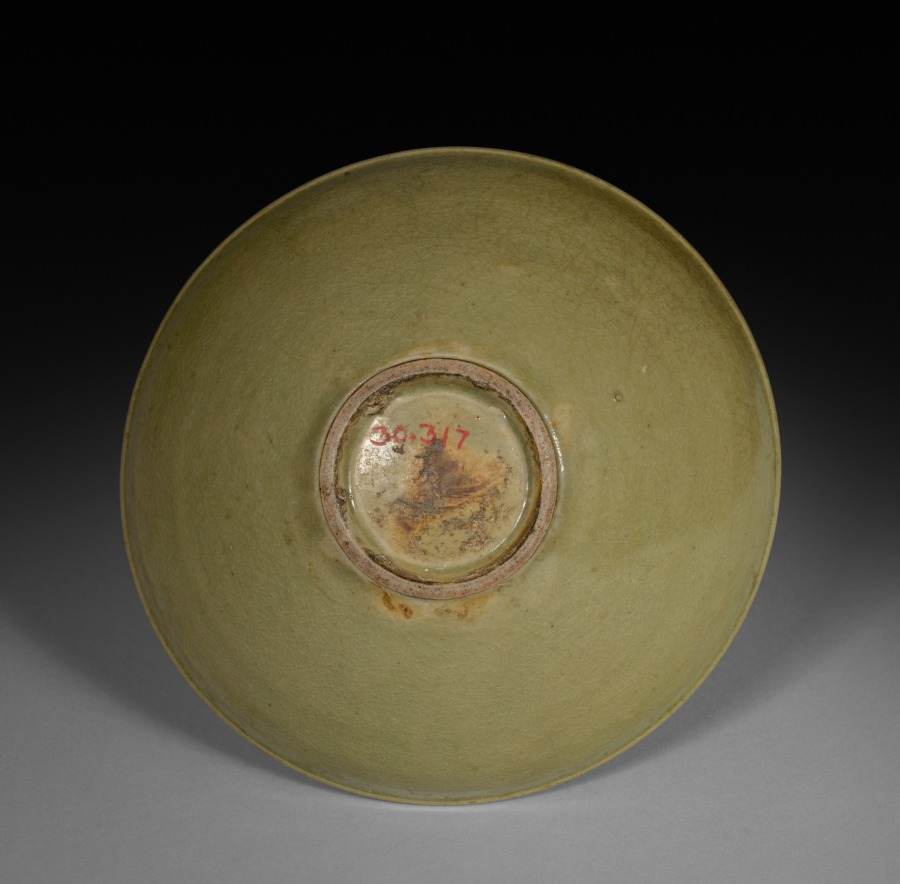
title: Bowl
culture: China, Jin dynasty (1115-1234)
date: 1100s-1200s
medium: Glazed light gray porcelain, Northern Celadon ware, Yaozhou type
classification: Ceramic